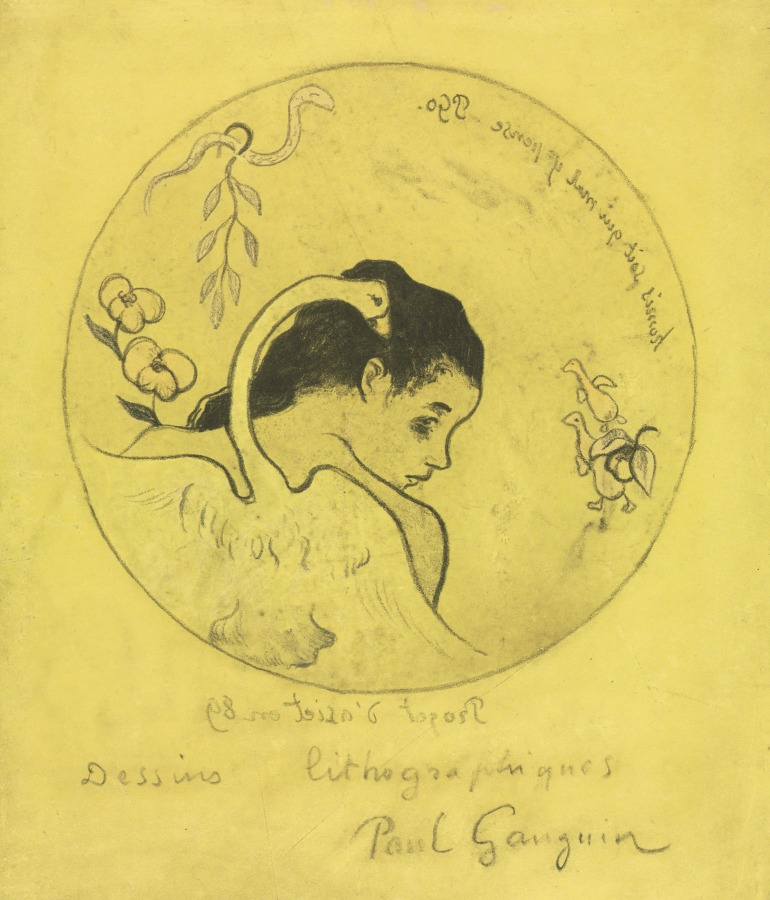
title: Volpini Suite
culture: France, 19th century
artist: Paul Gauguin (French, 1848–1903)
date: 1889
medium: zincograph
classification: Print